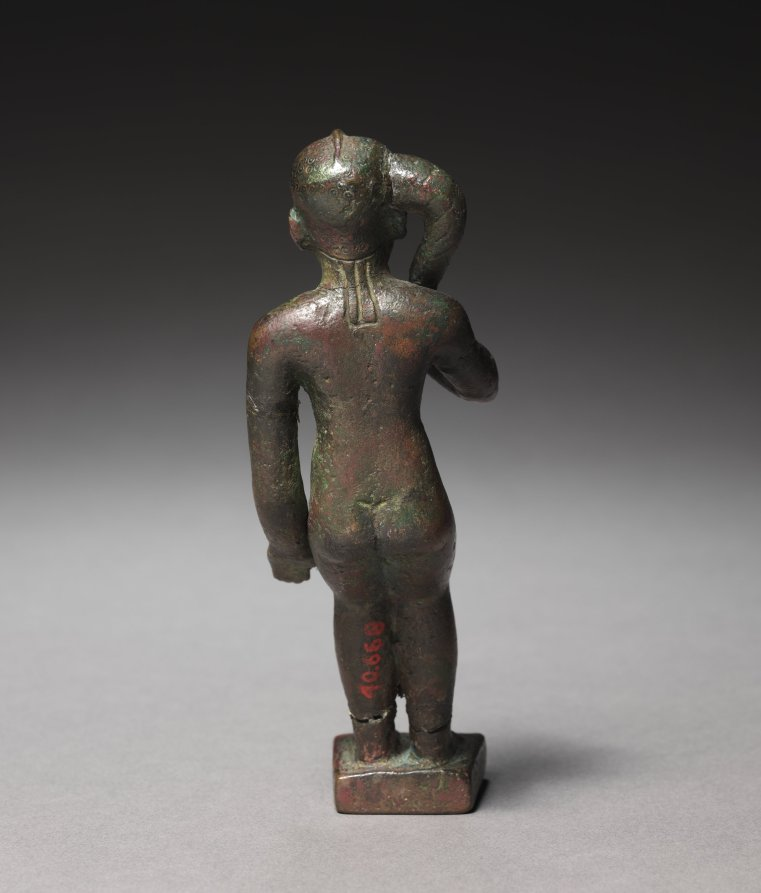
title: Statuette of Harpocrates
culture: Egypt, Greco-Roman period (332 BCE–395 CE), Ptolemaic dynasty (305–30 BCE)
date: 305–30 BCE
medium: bronze, solid cast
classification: Sculpture